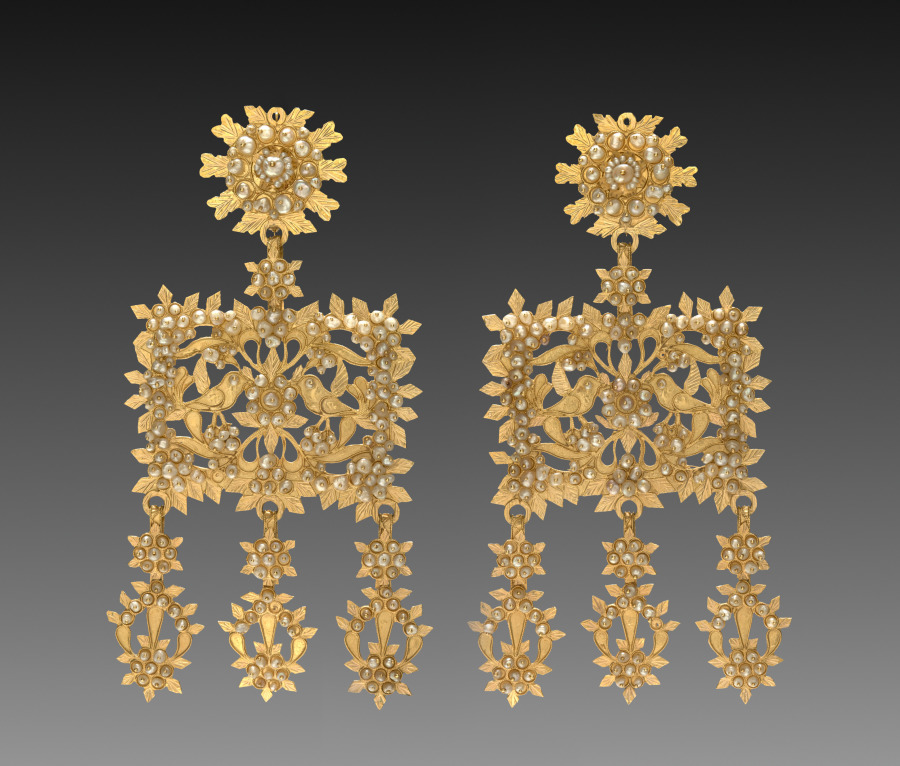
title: Pair of Earrings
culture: Italy, Sardinia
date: 1700s - 1800s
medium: gold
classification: Jewelry